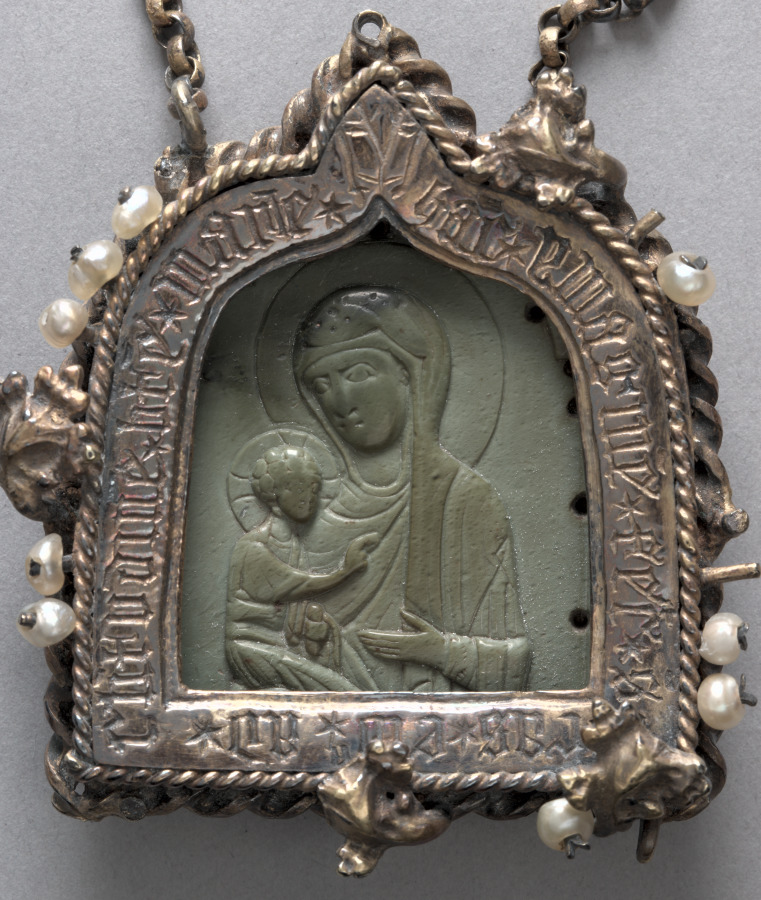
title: Pendant Icon with the Virgin "Dexiokratousa" and Frame with Winged Bull of Saint Luke on the back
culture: Byzantium (pendant); Germany, Aachen (frame), Byzantine period, 12th century (pendant); Byzantine period, 14th century (frame)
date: pendant 1100s; frame mid-1300s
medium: steatite, gilt silver, pearls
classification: Glyptic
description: This small-scale Byzantine icon depicts a half-length figure of the Virgin holding the Christ child. When the icon was mounted in its present frame by a German artist in the 14th century, it was considered to be an authentic portrait painted by Saint Luke. This claim, made in an inscription on the frame, is further emphasized by the ox, Saint Luke’s symbol, engraved on the frame’s reverse.